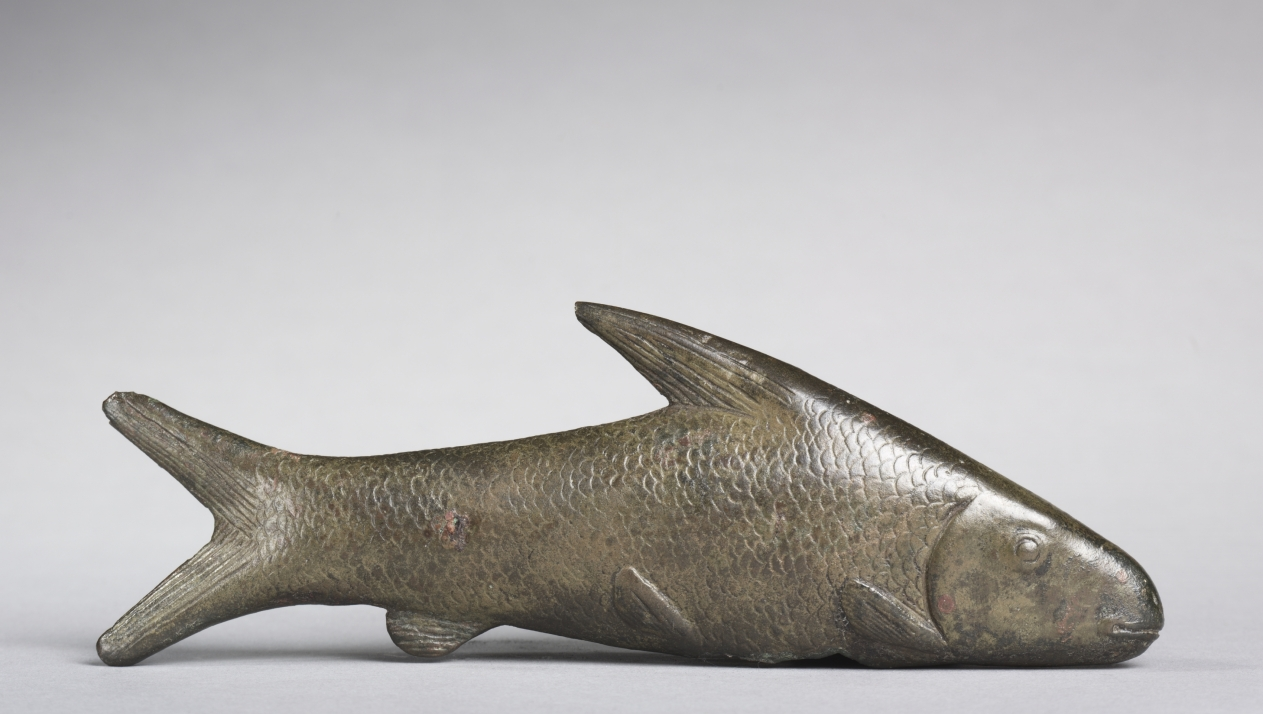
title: Lepidotus Fish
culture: Egypt, Greco-Roman period (332 BCE–395 CE), Ptolemaic dynasty (305–30 BCE)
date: 305–30 BCE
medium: bronze, hollow cast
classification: Sculpture